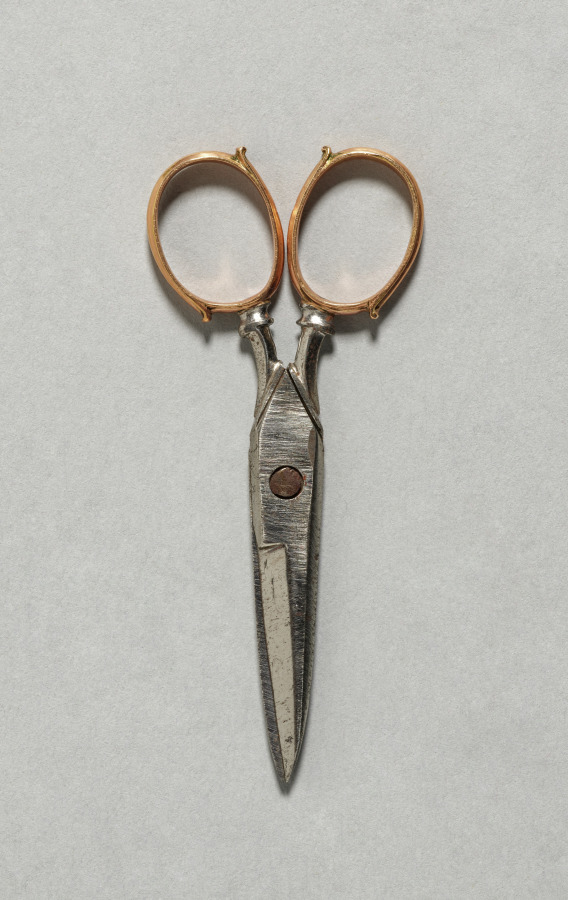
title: Scissors from a Sewing Box (Nécessaire)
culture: Austria, possibly Vienna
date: c. 1765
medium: gold and mother-of-pearl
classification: Miscellaneous